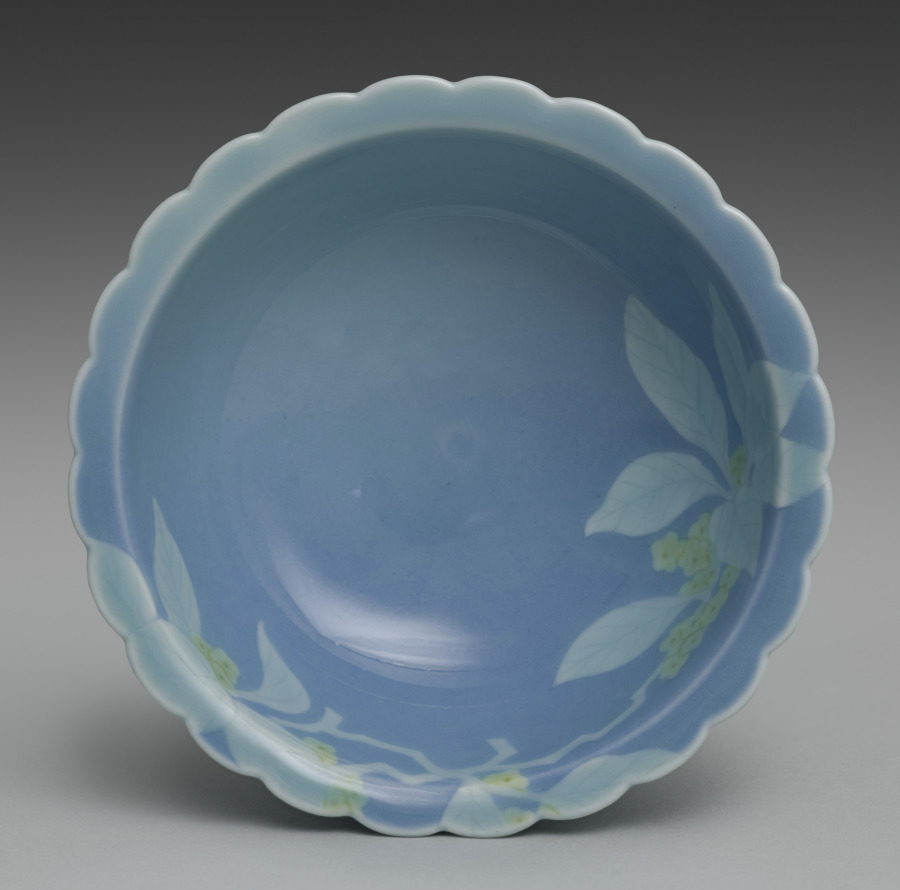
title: Dish from Dishes with Flowers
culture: Japan, Taishō period (1912–26) or Shōwa period (1926–89)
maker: Seifū Yohei IV (Japanese, 1872–1951)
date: 1914–46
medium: One from a set of five dishes; porcelain with underglaze yellow and blue glaze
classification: Ceramic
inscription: 清風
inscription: 清風造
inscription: 成山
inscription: 清風盧人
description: One can imagine a cool summer breeze when looking at this set of dishes, each shaped with a crenulated mouth and glazed with blue. Around the rim and into the basin, the bowls have low-relief designs of flowers with underglaze yellow petals; their leaves and stems show white through the glaze. On each dish, the design continues over the rim onto one side.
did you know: Seifū Yohei IV’s dishes with flowers feature underglaze yellow.